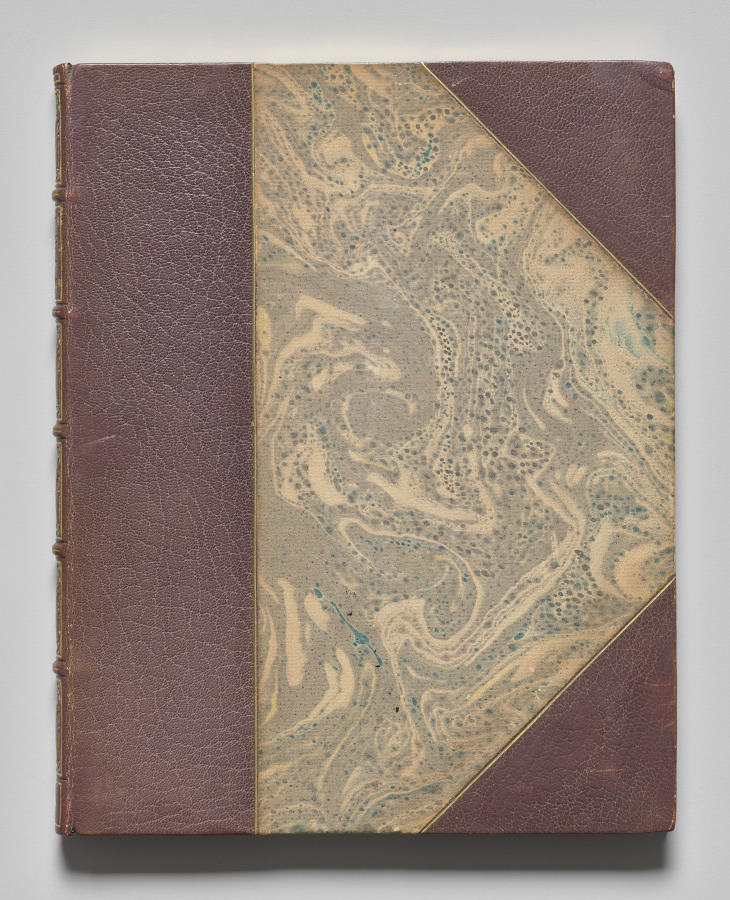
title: La Loïe Fuller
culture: France, early 20th Century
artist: Pierre Roche (French, 1855–1922)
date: 1904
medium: gypsograph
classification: Bound Volume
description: Although best known as a sculptor, Roche was a versatile and prolific artist who worked in many mediums. Loïe Fuller, the pioneer of modern dance who took Paris by storm in 1892, was one of his favorite subjects. He portrayed her in clay, bronze, marble, plaster, and in a series of gypsographs that illustrated an essay by the art critic Roger Marx. The book was described as "a precious monument to Loïe Fuller."